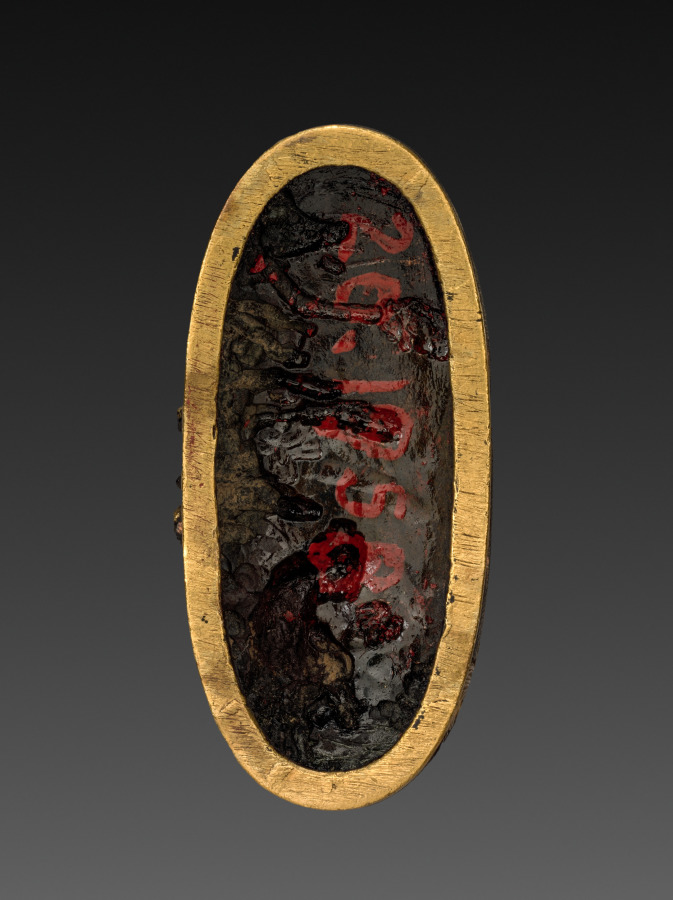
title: Sword-Hilt Pommel (Kashira)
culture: Japan, Edo period (1615–1868)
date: 1700–1850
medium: shakudo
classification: Arms and Armor